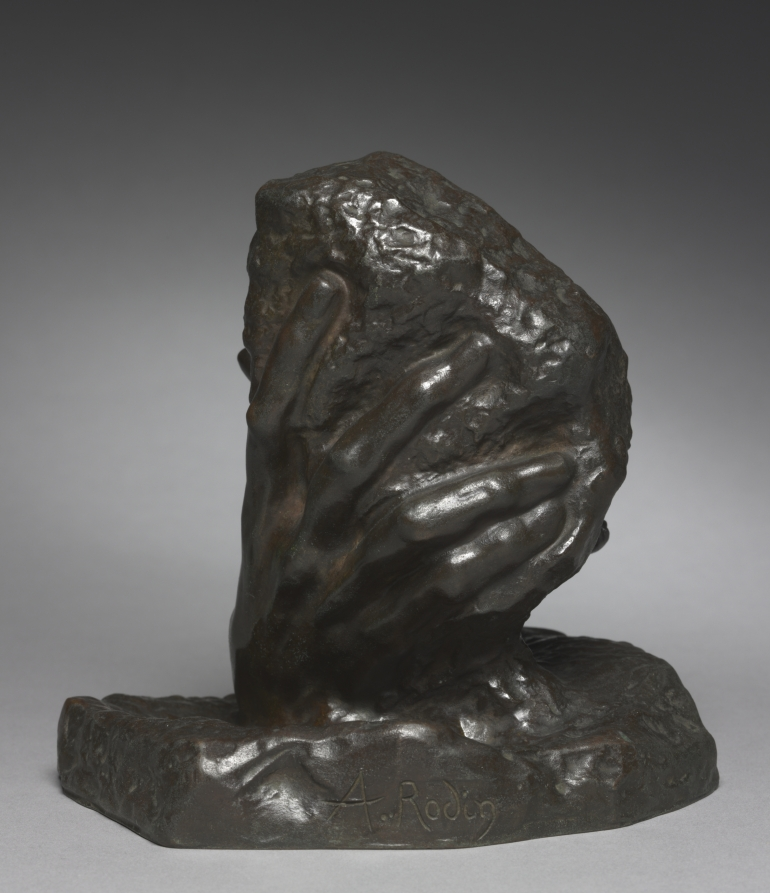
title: The Hand of God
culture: France, late 19th-early 20th Century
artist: Auguste Rodin (French, 1840–1917)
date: c. 1880 – 1917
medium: bronze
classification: Sculpture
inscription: Signed on back and in relief inside the lower base: "A. Rodin"